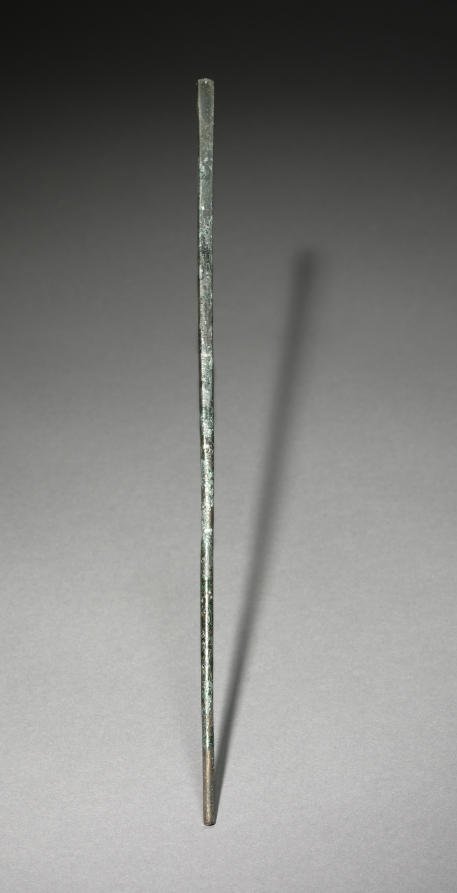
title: Chopstick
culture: Korea, Goryeo dynasty (918–1392)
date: 918–1392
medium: bronze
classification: Metalwork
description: In Korea, chopsticks made of metal such as brass, silver, and gold were excavated from ancient tombs and ruins dated to the 6th century at the earliest. Burial goods often include utilitarian objects such as table wares and utensils because the dead were believed to need them in the afterlife.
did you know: In contrast to the Chinese and Japanese, Koreans still prefer metal chopsticks (stainless steel and brass) to wooden ones.